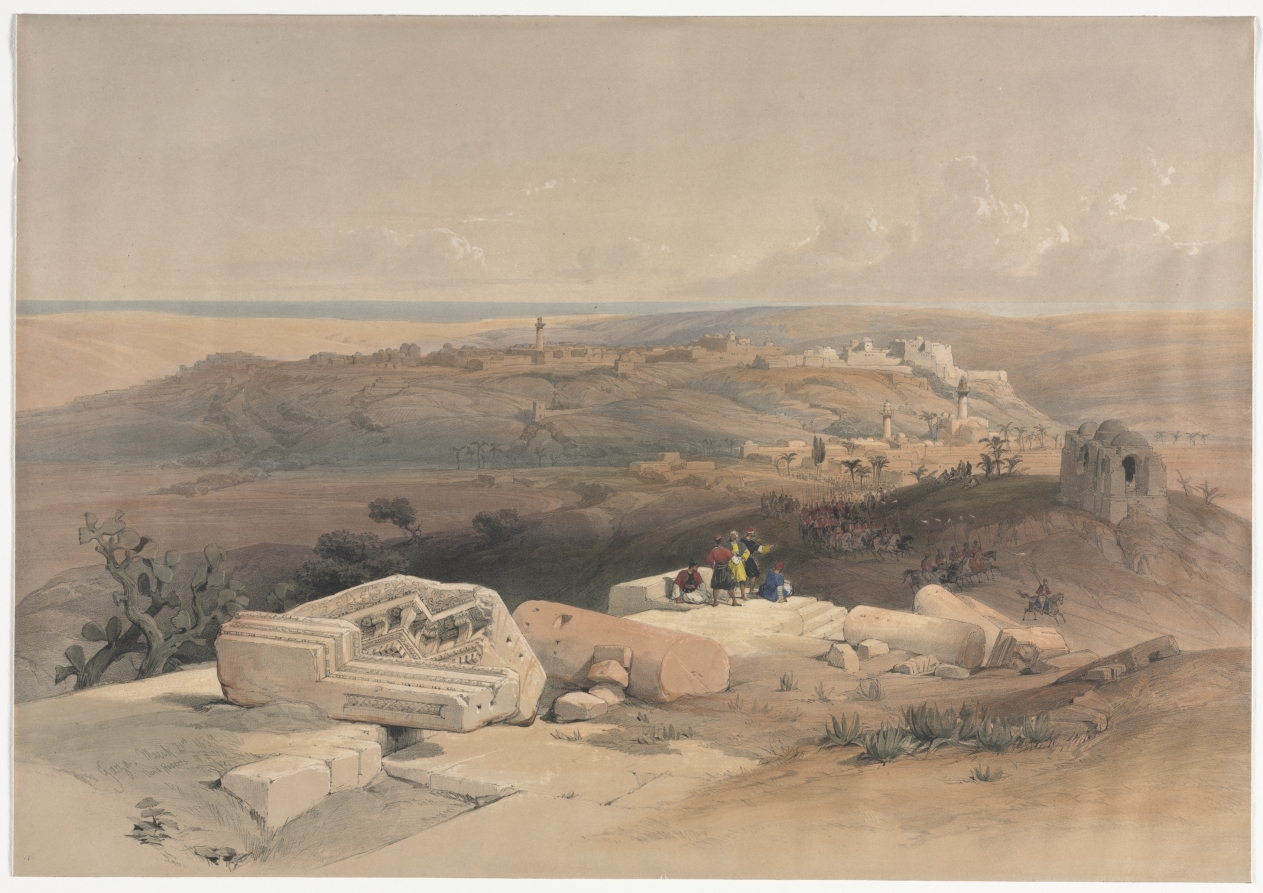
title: Gaza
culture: England, 19th century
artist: David Roberts (Scottish, 1796–1864)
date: 1839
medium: color lithograph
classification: Print